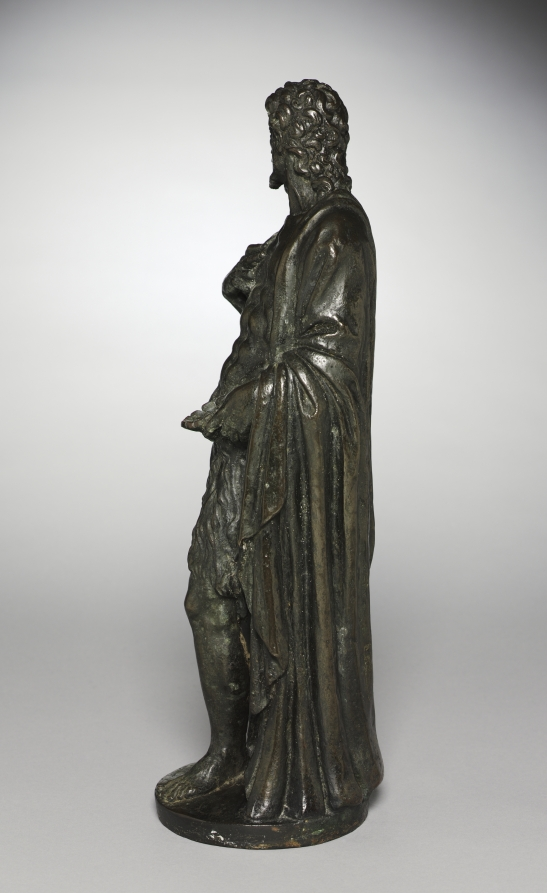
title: Saint John the Baptist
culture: Italy, Verona, 16th century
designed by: Angelo de Rossi (Italian)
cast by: Giuseppe de Levis (Italian, 1605)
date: late 1500s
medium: bronze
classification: Sculpture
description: Saint John wears the hair shirt he fashioned during his retreat into the wilderness to live humbly. He clenches a device of baptism, a shell to pour the water.